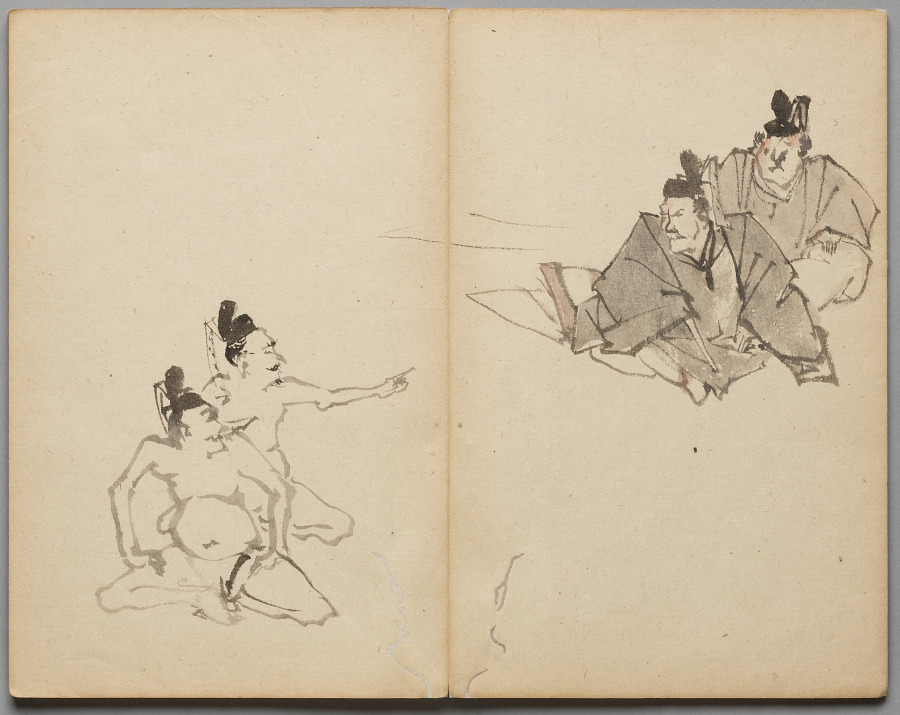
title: Courtiers from Sketch Album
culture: Japan, Edo period (1615–1868) to Meiji period (1868–1912)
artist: Kawanabe Kyōsai (Japanese, 1831–1889)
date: mid- to late 1800s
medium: Accordion-style book of 26 double-leaves; ink and color on paper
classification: Bound Volume